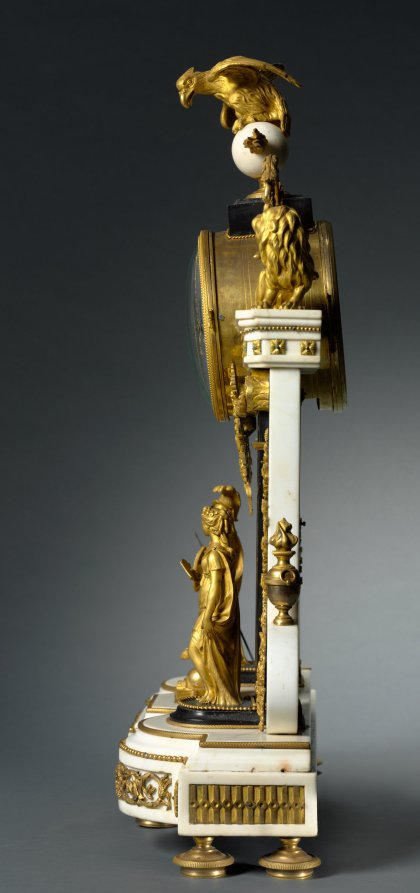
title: Mantel Clock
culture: France, Paris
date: c. 1780–90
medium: marble, gilt-bronze, glass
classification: Stone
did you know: This clock echoes elements of Greek mythology. At left, Athena stands with her helmet on and shield ready. Screen reader support enabled.